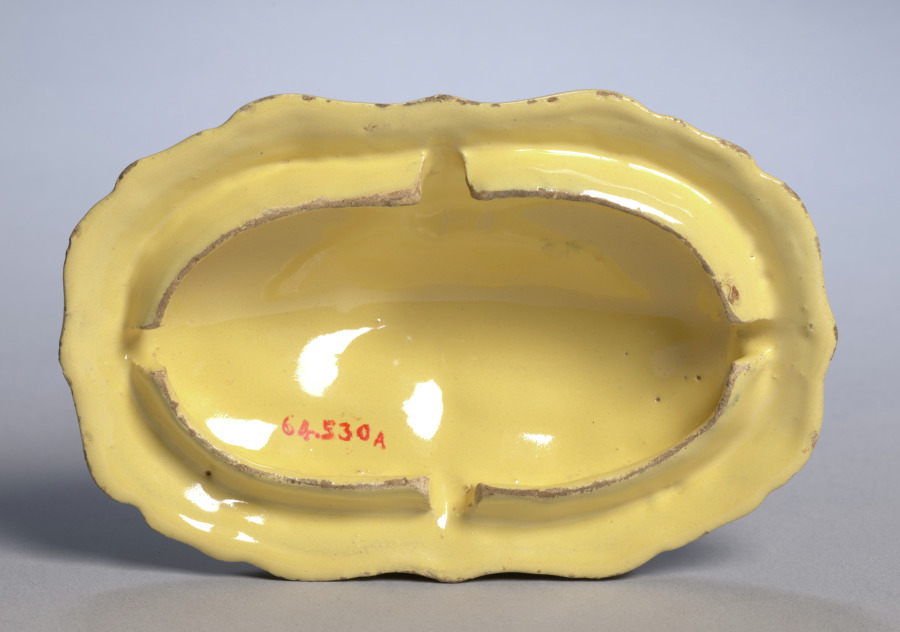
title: Cover for a Spice Bowl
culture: France, Montpellier, 18th century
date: c. 1775–80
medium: faience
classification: Ceramic